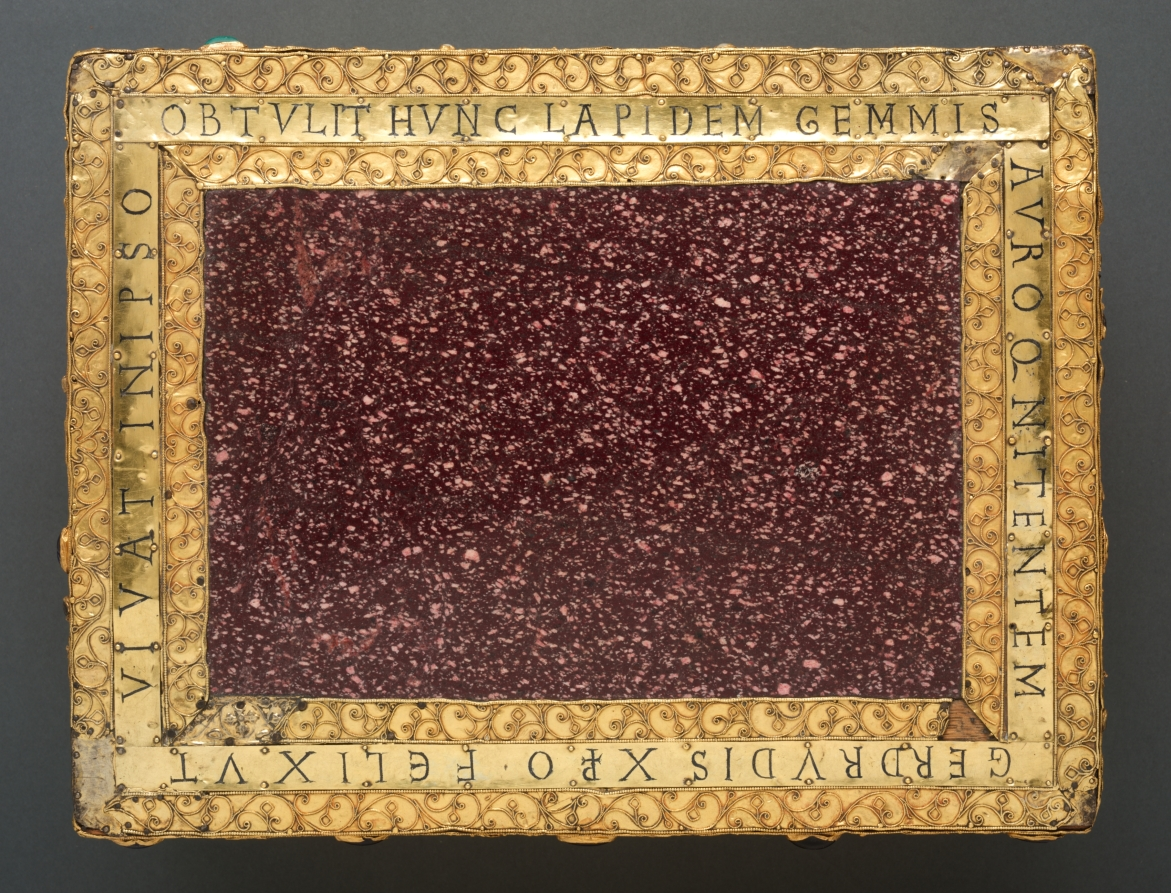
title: Portable Altar of Countess Gertrude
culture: Germany, Lower Saxony?, Romanesque period, 11th century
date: c. 1045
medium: gold, cloisonné enamel, porphyry, gems, pearls, niello, wood core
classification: Metalwork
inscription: GERDRVDIS XPO FELIX VT | VIVAT IN IPSO OBTVLIT HVNC LAPIDEM GEMMIS | AVROQ NITENTEM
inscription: SIGISMVNDVS, CONSTANTIVS, SANCTA CRVX, SCA ELENA, SCA ADALHEIT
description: Commissioned by Countess Gertrude of Brunswick, this portable altar is one of the Guelph Treasure’s earliest and most sumptuous objects. The choice of white-speckled porphyry as the altar stone signals Gertrude’s worldly aspirations; an imperial color since classical antiquity, porphyry was only used by the imperial family. Historical figures of royal and imperial rank are depicted with Christ, the Virgin, apostles, and archangels along the altar’s sides, stressing the countess’s political ambitions and claim of imperial lineage for her own dynasty. The Latin inscription surrounding the altar stone reads, "Gertrude offers to Christ, to live joyfully in him, this stone that glistens with gems and gold."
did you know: On the bottom of this altar is a trap door that opened to reveal small relics of saints wrapped in silk.